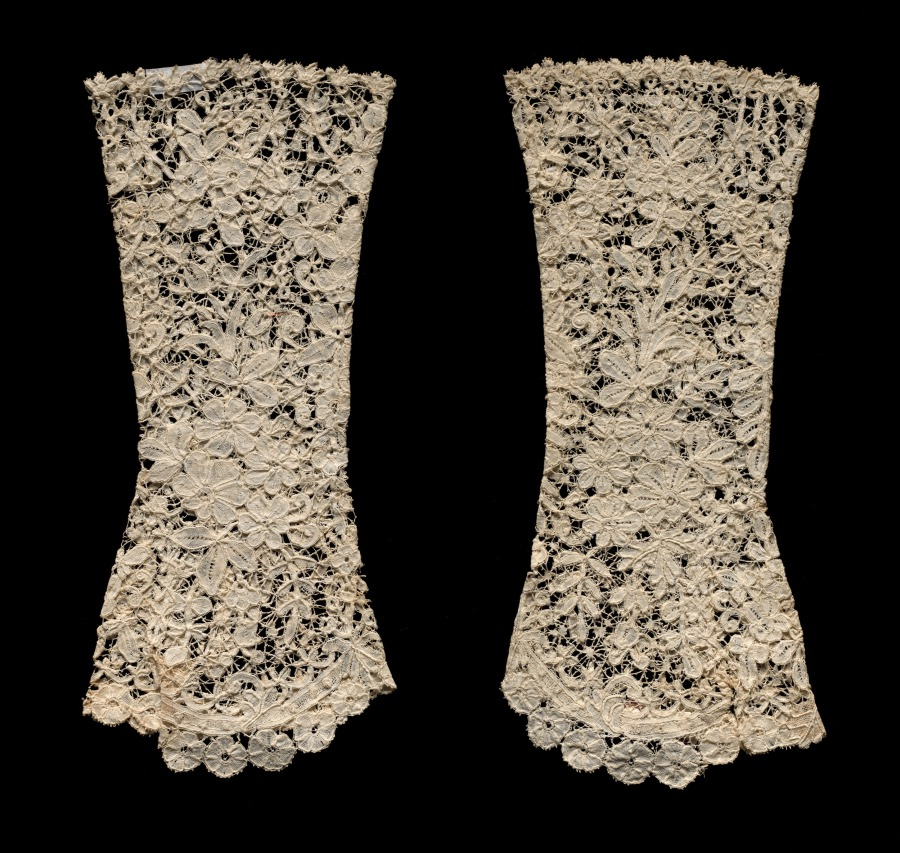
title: Pair of Gloves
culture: Flanders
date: c. 1850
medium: Bobbin lace (Duchese lace)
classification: Lace